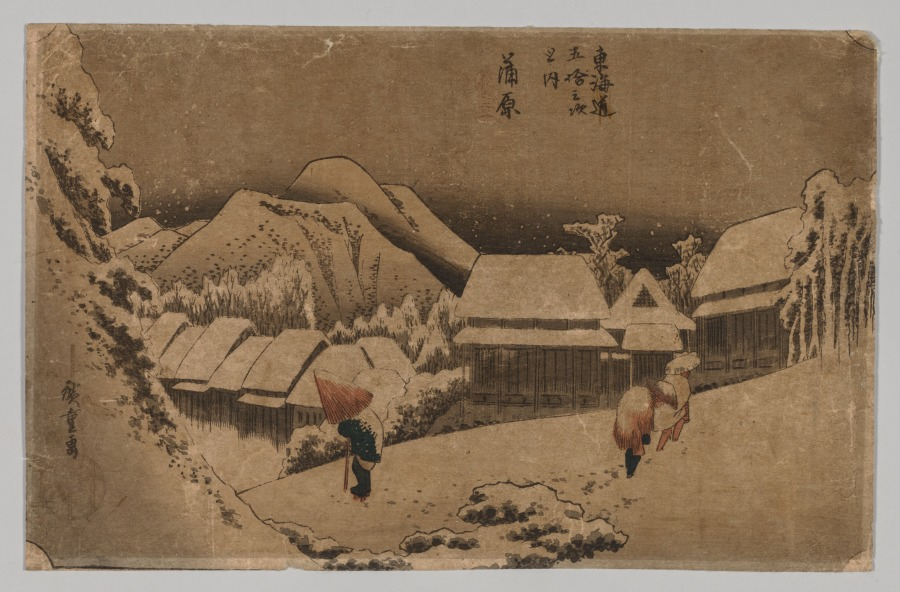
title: Kambara: Evening Snow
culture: Japan, Edo period (1615–1868)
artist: after Utagawa Hiroshige (Japanese, 1797–1858)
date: 1797–1858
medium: color woodblock print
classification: Print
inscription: Signature: Hiroshige Gwa (two character signature of middle period) Publisher Seal: Take-Uchi